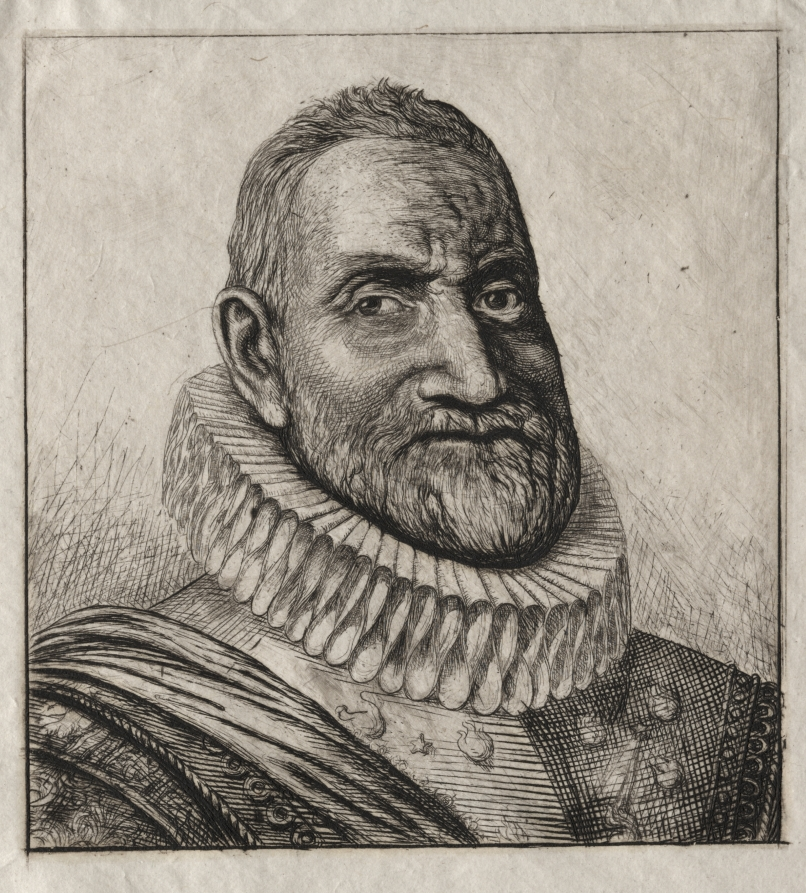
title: Theodore Agrippa d'Aubigné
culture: France, 19th century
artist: Charles Meryon (French, 1821–1868)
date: 1862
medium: etching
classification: Print